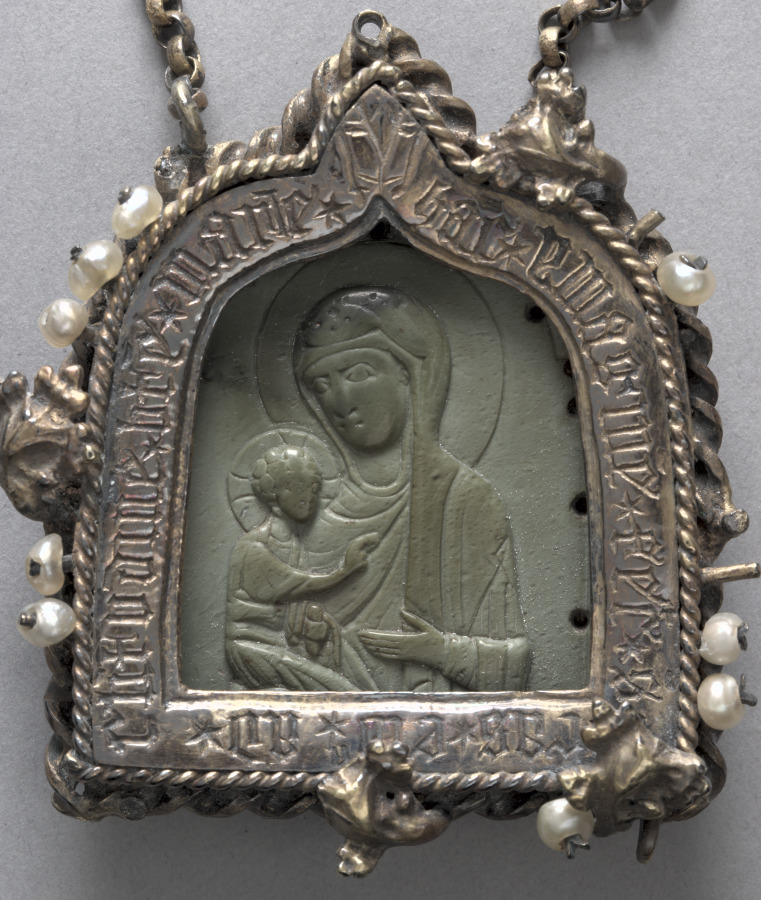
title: Pendant Icon with the Virgin "Dexiokratousa" and Frame with Winged Bull of Saint Luke on the back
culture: Byzantium (pendant); Germany, Aachen (frame), Byzantine period, 12th century (pendant); Byzantine period, 14th century (frame)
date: pendant 1100s; frame mid-1300s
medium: steatite, gilt silver, pearls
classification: Glyptic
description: This small-scale Byzantine icon depicts a half-length figure of the Virgin holding the Christ child. When the icon was mounted in its present frame by a German artist in the 14th century, it was considered to be an authentic portrait painted by Saint Luke. This claim, made in an inscription on the frame, is further emphasized by the ox, Saint Luke’s symbol, engraved on the frame’s reverse.